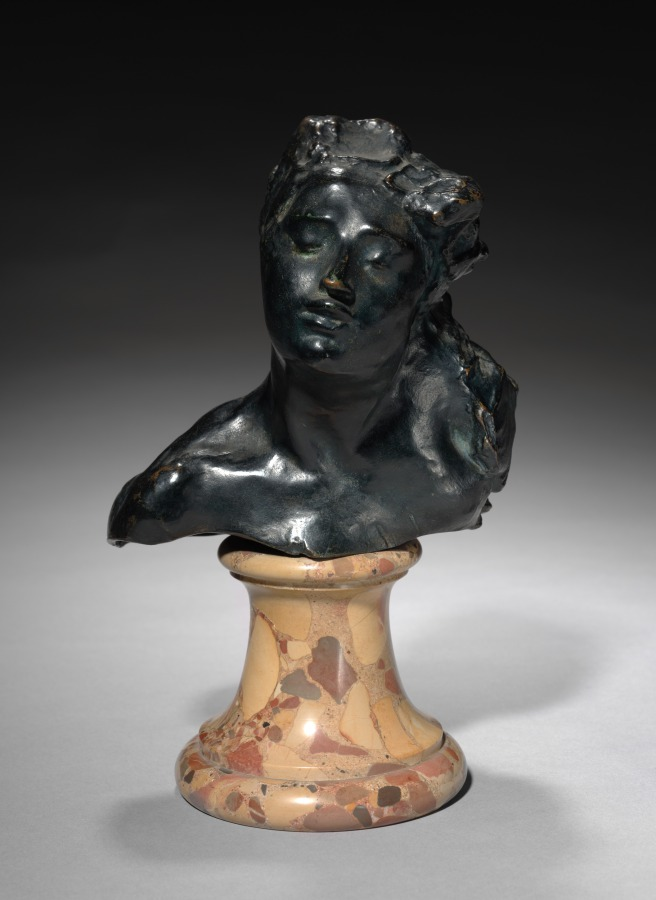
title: Head of the Little Martyr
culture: France, late 19th-early 20th century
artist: Auguste Rodin (French, 1840–1917)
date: c. 1880 – 1885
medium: bronze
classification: Sculpture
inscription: Signed sinister side: "A. Rodin"; inside front in relief: "A. Rodin"